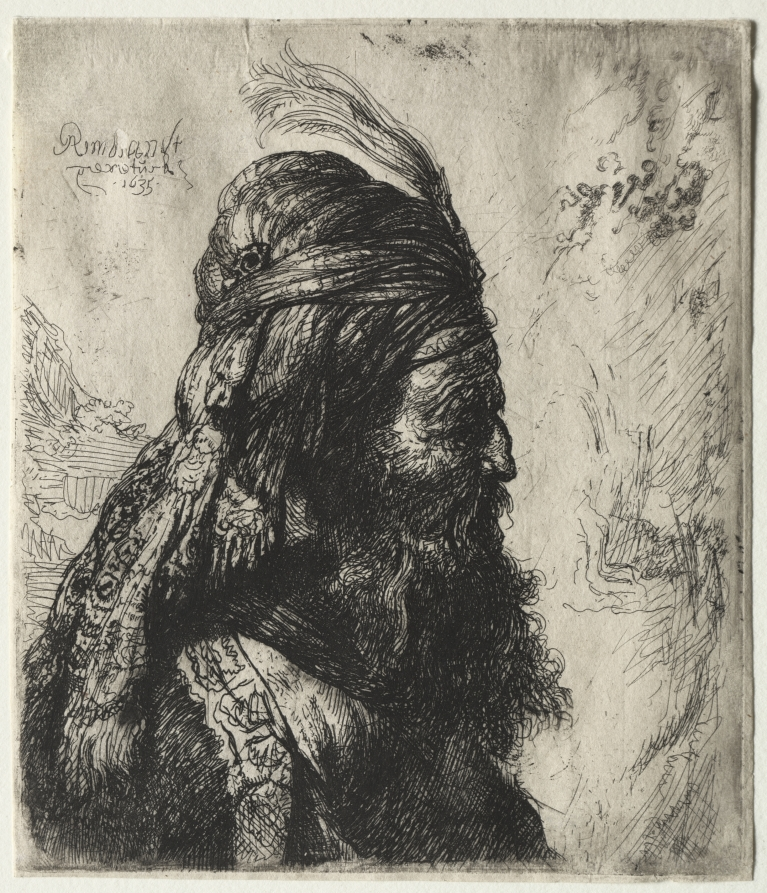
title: The Third Oriental Head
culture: Netherlands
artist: Rembrandt van Rijn (Dutch, 1606–1669)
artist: and Anonymous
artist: copy after Jan Lievens (Dutch, 1607–1674)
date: 1635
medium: etching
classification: Print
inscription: upper left, in plate: Rembrandt / g[reversed]eretuck / ·1635· ; VERSO, lower left, in graphite: B 288 ; lower left, in graphite: /1869 ; lower left, in graphite: S 38665 ; lower center, in graphite: 40644 ; lower center, pen and black ink: N. Mossoloff. ; lower center, in graphite: B 238 H133 only state g. 200